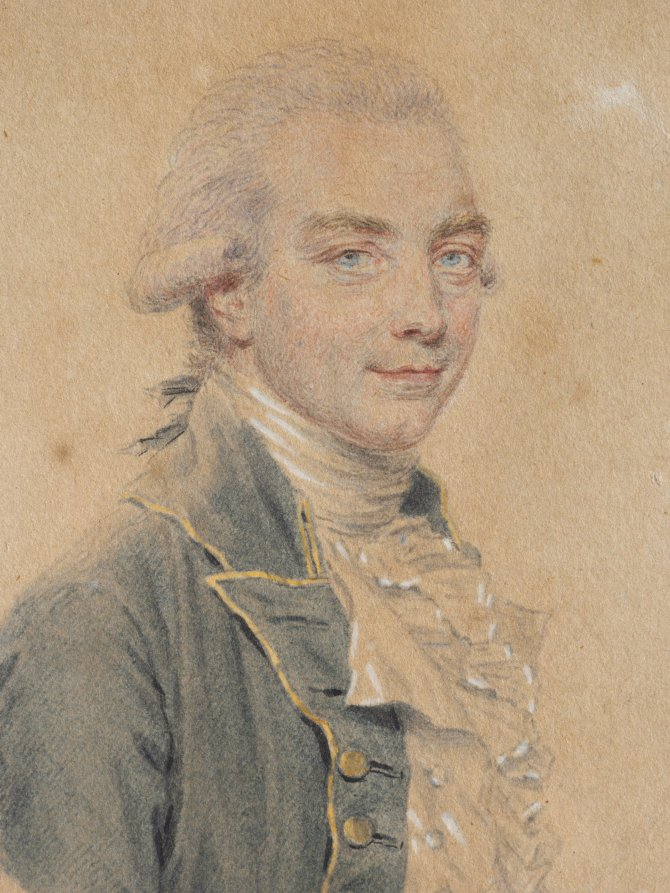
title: Portrait of Sir John Macpherson, 1st Baronet, Governor-General of India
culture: England, 18th century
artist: John I Smart (British, 1741–1811)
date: 1787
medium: watercolor and gouache heightened with white gouache on paper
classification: Portrait Miniature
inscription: signed, lower right, in black ink: J S / 1787 / Madras ; VERSO, lower right, in graphite: 6 1/8 x 6 7/8 Foskett, Daphne. John Smart: The Man and His Miniatures, pp. 13, 76, 89. London: Cory, Adams & Mackay, 1964.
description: The sitter’s head and shoulders face left. He smiles slightly and has light blue eyes, with his powdered hair curled above the ear and tied en queue. He wears a green jacket edged in gold with gold buttons and dons a high white collar, a waistcoat, and a frilled cravat, each highlighted with white gouache. The nature of this work as a finished drawing rather than exclusively a preparatory sketch for a miniature on ivory is evident in the degree of finish of the sitter’s clothing, which is painted to the oval termination within a border of pale blue gouache. A Colnaghi label was removed from the verso after the work entered the museum’s collection. Sir John Macpherson (1745–1821) was the son of a Scottish minister. His many tours of service with the East India Company were marred by corruption and scandal. He was made acting governor-general of India in 1785–86 between the resignation of Warren Hastings (1732–1818) and the succession by Lord Cornwallis (1738–1805). Macpherson was created a baronet in 1786 when he was removed from office, returning to England shortly thereafter. He was an inveterate bachelor, popular in society for his handsomeness, charm, and facility with languages, but also known for his avarice and fraudulence. The work is signed with Smart’s initials and dated “1787 Madras” at the lower right. Macpherson was no longer governor-general in 1787 and would have been preparing to return to England when this portrait was painted. The drawing is inscribed on the back in the artist’s hand: “a sketch of Sir John Macpherson painted at Madras, 1787, on his passage from Bengall [sic] to England by Jno [sic] Smart.” Smart did not return to England until 1795, so the word passage must be defined as “on his journey” rather than “aboard ship.” At the time this portrait was taken, Macpherson was grappling with his premature removal from office and beginning to plot what would become many years of negotiations to regain his position or receive compensation for having lost it, though none of this emotional turmoil is visible in Smart’s portrait.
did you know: John Smart retained hundreds of sketches which were passed down in turn to his son, granddaughter, and great-grandchildren.